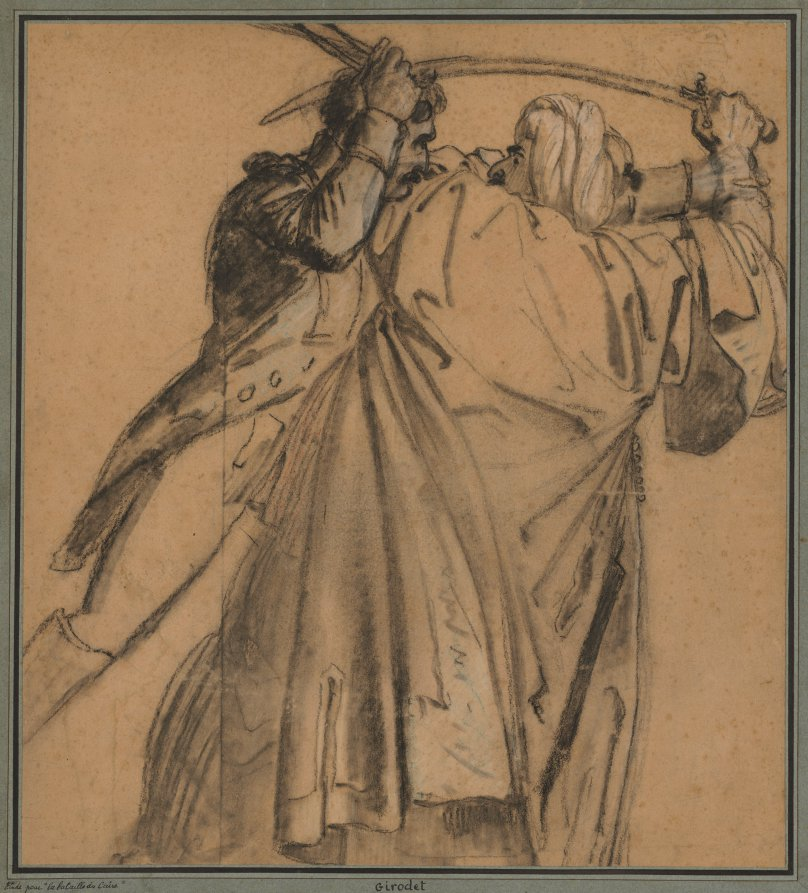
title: Two Arabs, for "The Revolt of Cairo"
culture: France, 19th century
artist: Anne-Louis Girodet de Roucy-Trioson (French, 1767–1824)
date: c. 1810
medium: black chalk heightened with white chalk, with traces of blue chalk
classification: Drawing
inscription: SECONDARY SUPPORT, lower left, in black ink: Etude pour "la bataille du Caire" ; lower center, in black ink: Gitodet ; VERSO, upper left, in graphite: Girodet [underlined] ; upper cener, in graphite: Etude pour la bataille du Caire (Musée de Versailles) ; ON A SEPERATELY APPLIED PIECE OF PAPER, verso, center, printed in black ink: Quai Malaquais Nº 19, / MALARD / Sussefseur de M. Gerset, / Fait l'Encadermentet le Collage des Dessins, / Gravures, Passe-Partouts, &c, &c. / A PARIS ; ON A FRAME BACKING (now removed, fragment in departmental file), in black ink: Girodet de Roucy Trioson / Etude pour la "bataille du Caire" (musée de Versailles) [parentheses part of inscription] / - anc. coll de musigny ; ON A SEPERATELY APPLIED PIECE OF PAPER (on an old backing, on removed and in departmental file), printed in black ink: GIRODET / 108. --- Combat entre un Français et un Arabe / Pierre noire, rehaussée / Vente [illegible] 6 Déc. 1903 [the last line inscribed in black ink]